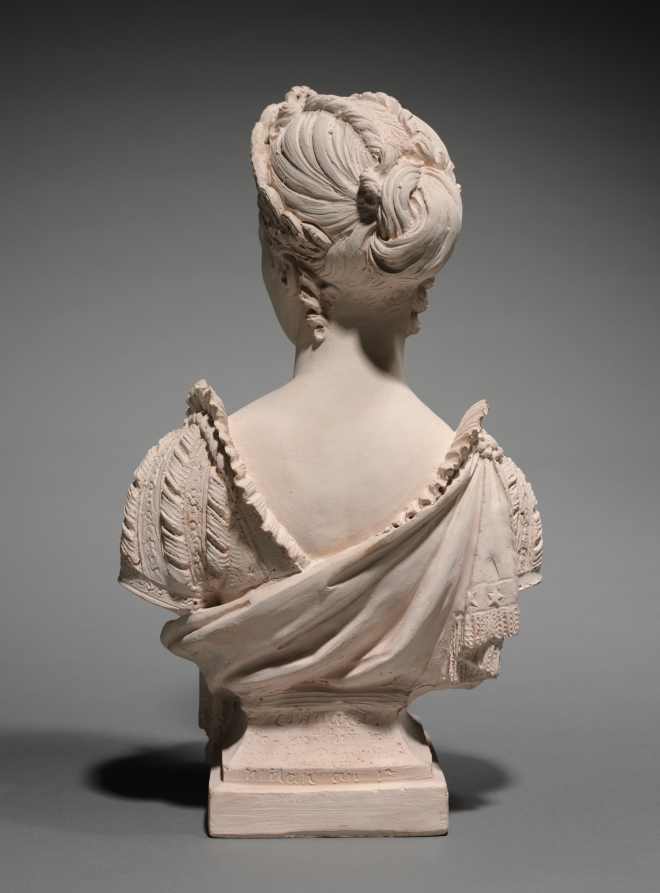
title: Bust of Empress Josephine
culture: France, 19th century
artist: Joseph Chinard (French, 1756–1825)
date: 1805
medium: terracotta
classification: Sculpture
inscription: inscribed on front of base in ligature: "chinard a milan"; inscribed on back of base in ligature: "chinard/de/l'institut m(al?)/membre de plusiere [sp]/ academies/milan-an l (3?)"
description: This bust of the Empress Josephine was sculpted in Milan in 1805 when she accompanied Napoleon to that city for his coronation as the King of Italy.